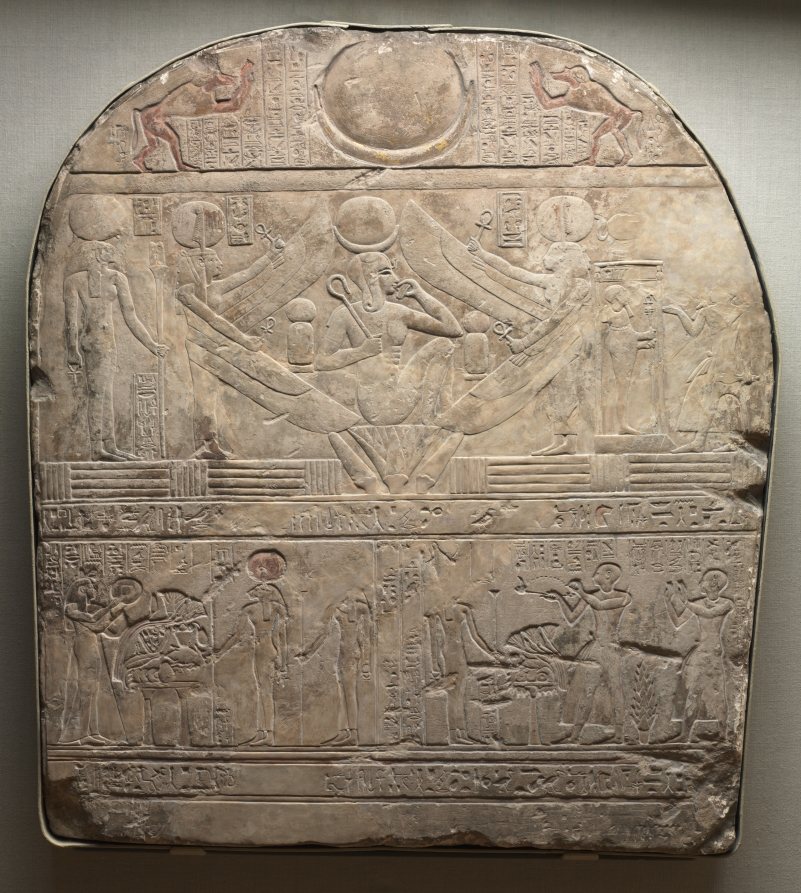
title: Stele of the High Priest of Ptah, Shedsunefertem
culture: Egypt, Third Intermediate (1069–715 BCE), Dynasty 22, reign of Shosheng I (943–922 BCE)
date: 945–924 BCE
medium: limestone, originally painted and gilded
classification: Sculpture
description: This stele of Shedsunefertem, the High Priest of Ptah, is rich in religious symbolism. In the center of the top register is a disk and crescent, originally gilded. At either side a baboon raises its arms in adoration. The Egyptians believed that the jabbering of the baboons at dawn was a hymn of praise to the sun god Ra in a secret language only the king understood. It begins, "Praising Ra when he shines on the horizon." Directly below in the middle register a child god is seated on a lotus flower. In Egyptian mythology the sun arose out of the primeval waters at the dawn of creation in a lotus flower. Winged figures of Maat, goddess of Truth, stand protectively at either side. The damaged figure of the high priest himself, wearing the panther skin and jackal-collar of his office, appears at the far right, worshipping the god Ptah, whose consort, the lioness-headed goddess Sekhmet, appears on the far left. The figures in the bottom register are colleagues who appear here as dependents under the powerful high priest's protection.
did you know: The eye and eyebrow of the young sun-god Ra (at center) were once inlaid.